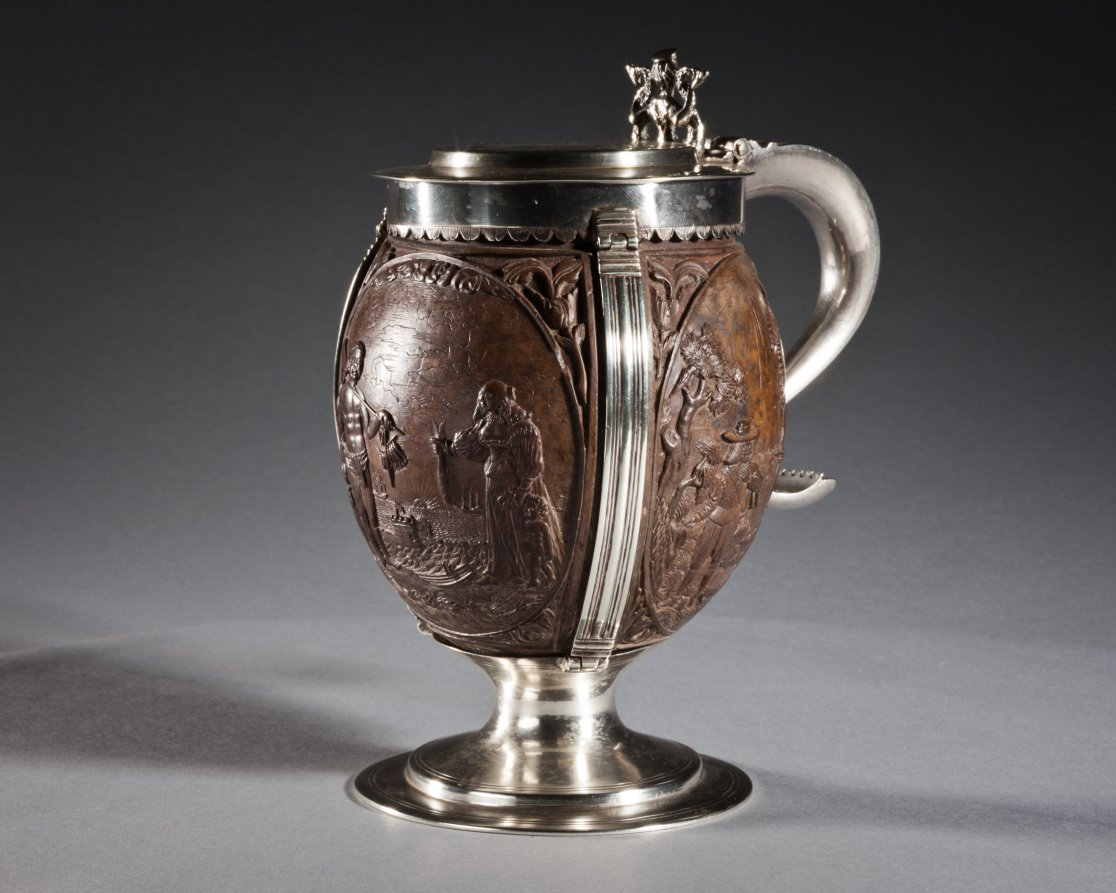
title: Coconut Cup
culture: carved coconut, probably The Netherlands; silver mount, probably England, 17th century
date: c. 1630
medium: carved coconut in silver mount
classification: Metalwork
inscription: top lid has engraved coat-of-arms, underside of lid has inscription: George Lewis TIVERTON Feby, 1st 1760.